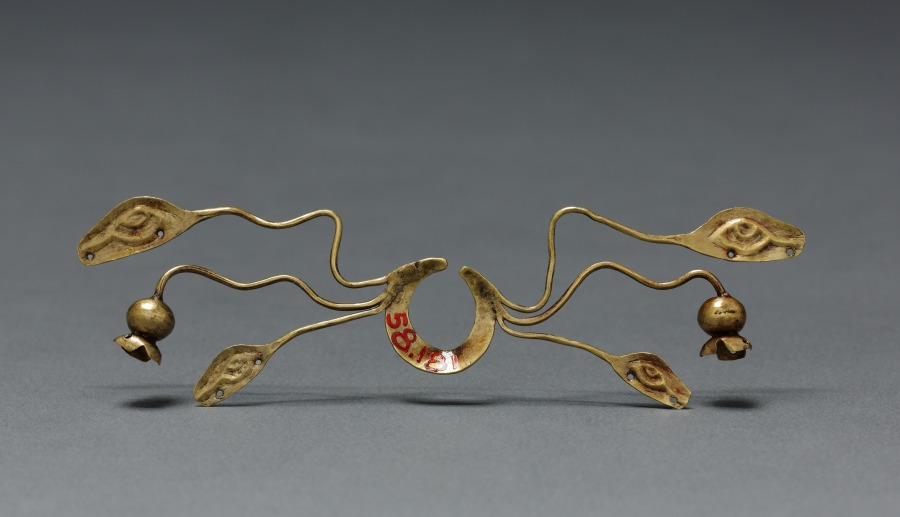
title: Nose Ornament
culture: Peru, North Highlands, Chavín de Huantar(?), Chavín style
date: c. 500–200 BCE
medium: cut and hammered gold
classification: Metalwork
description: There seems to be a link between Chavín religion and appearance of the Andes’ first large precious-metal objects, made using revolutionary new metallurgical processes. Chavín may have developed these technical innovations to express the inexpressible, the "wholly other" nature of its religion. In many areas, elite men and women wore the ornaments as emblems of their ties to this religion, and eventually were buried with them. These 16 objects, along with three others not in the museum’s collection, are said to have come as a group from Chavín itself.